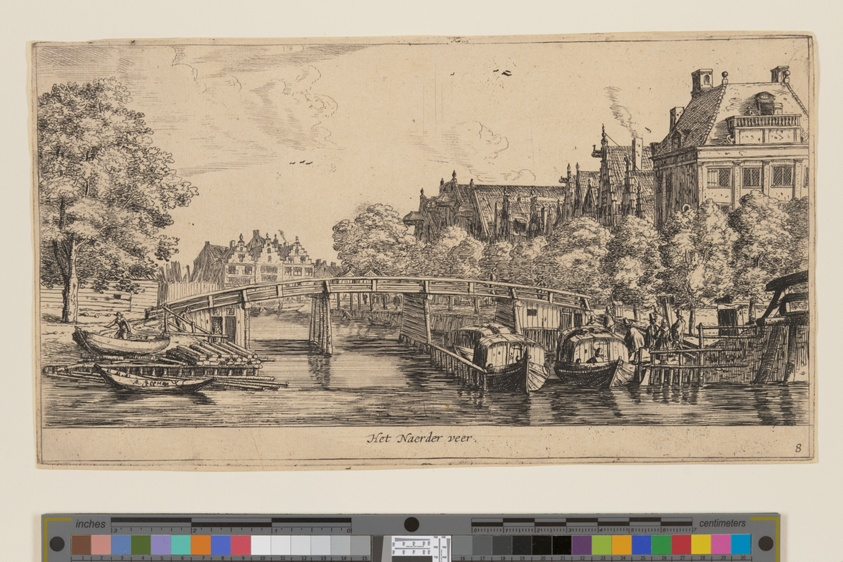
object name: Print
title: Het Naeder veer, from Views of Amsterdam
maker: Reinier Nooms, called Zeeman (Dutch, c. 1623–1664)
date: c. 1660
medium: Etching on ivory laid paper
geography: Netherlands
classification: etching; paper; print; prints and drawing